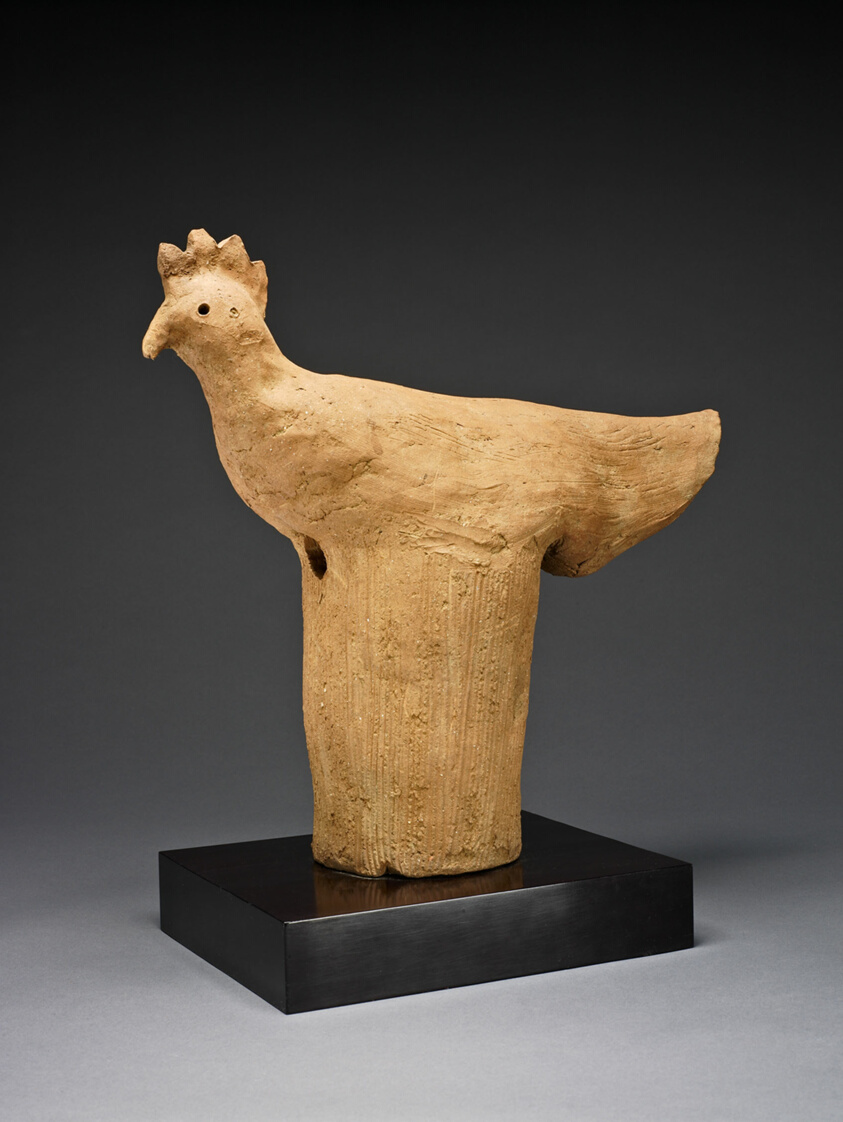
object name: Religious/Ritual Object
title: Hen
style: Japanese (culture or style)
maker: Japan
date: 6th century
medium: Earthenware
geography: Japan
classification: ritual objects